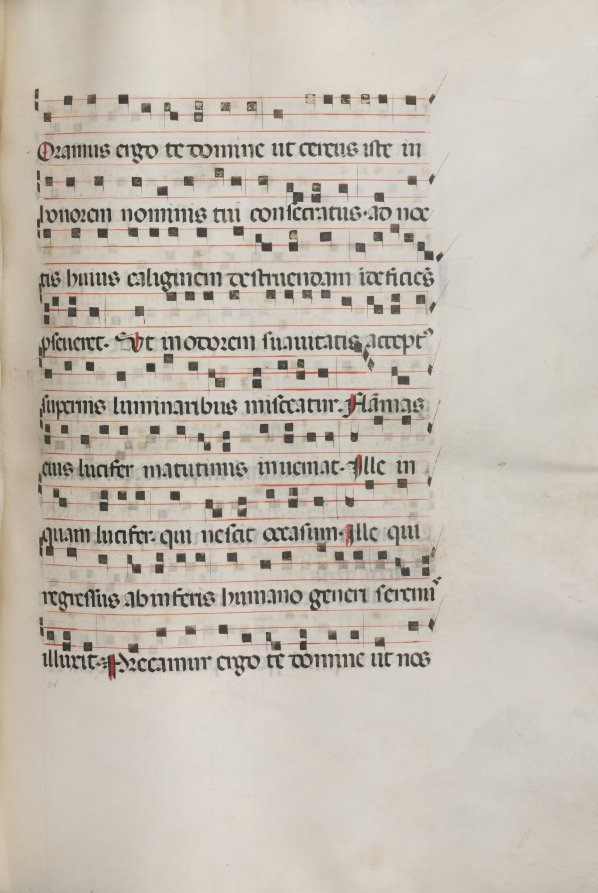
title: Missale: Fol. 157: Music for "Exultet"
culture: Italy, Perugia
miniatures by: Bartolommeo Caporali (Italian, c. 1420–1503)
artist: assisted by Giapeco Caporali (Italian, d. 1478)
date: 1469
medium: ink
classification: Bound Volume